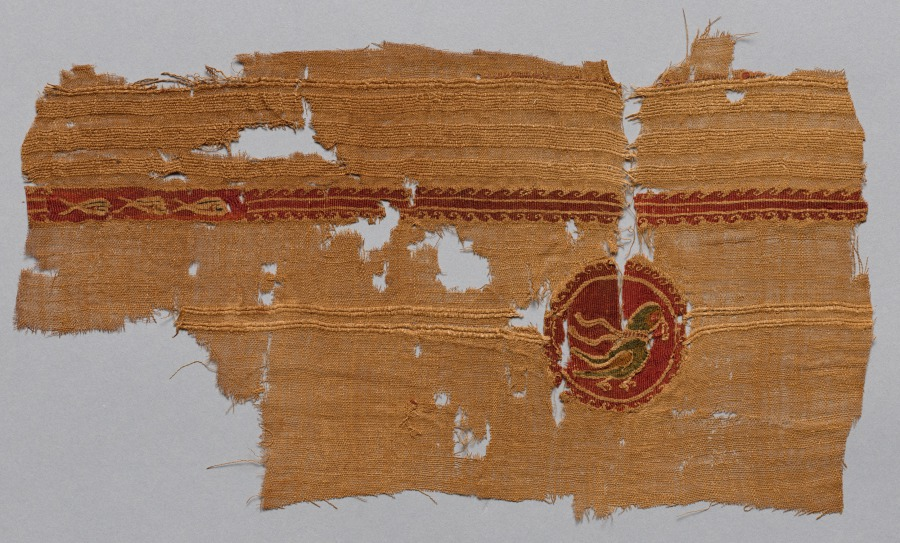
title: Fragment of Square Ornament with a Bird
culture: Egypt, Umayyad period (661–750)?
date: 600s - 700s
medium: tapestry (originally inwoven in tabby ground); linen and wool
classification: Textile